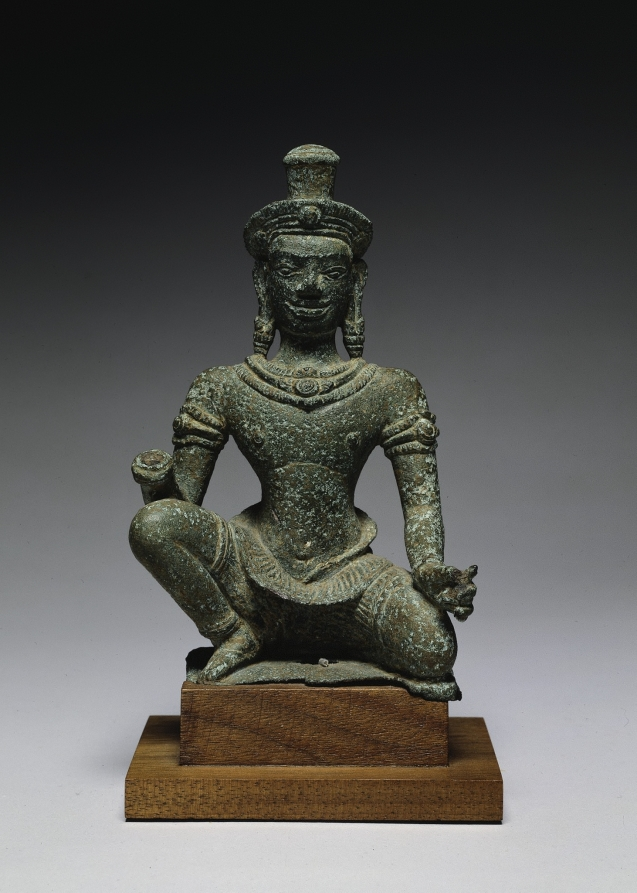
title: Kneeling Worshipper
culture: Cambodia, Angkor Wat style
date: 1100s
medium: bronze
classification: Sculpture